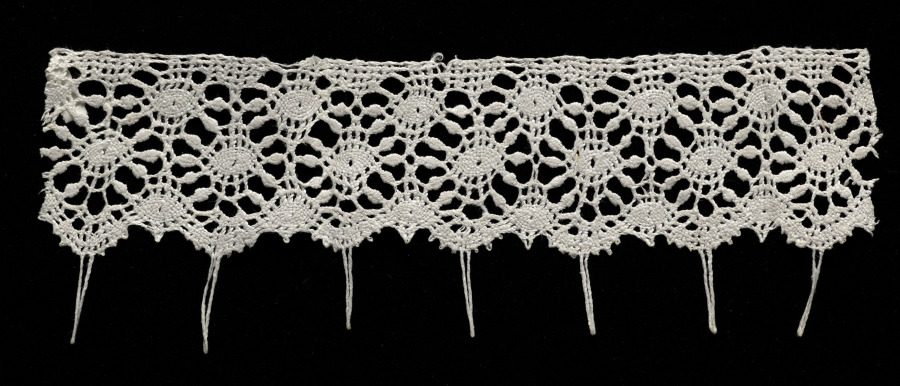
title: Lace Edging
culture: Italy, Genoa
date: 1600s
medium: Bobbin lace (needle lace design) edging with loops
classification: Lace